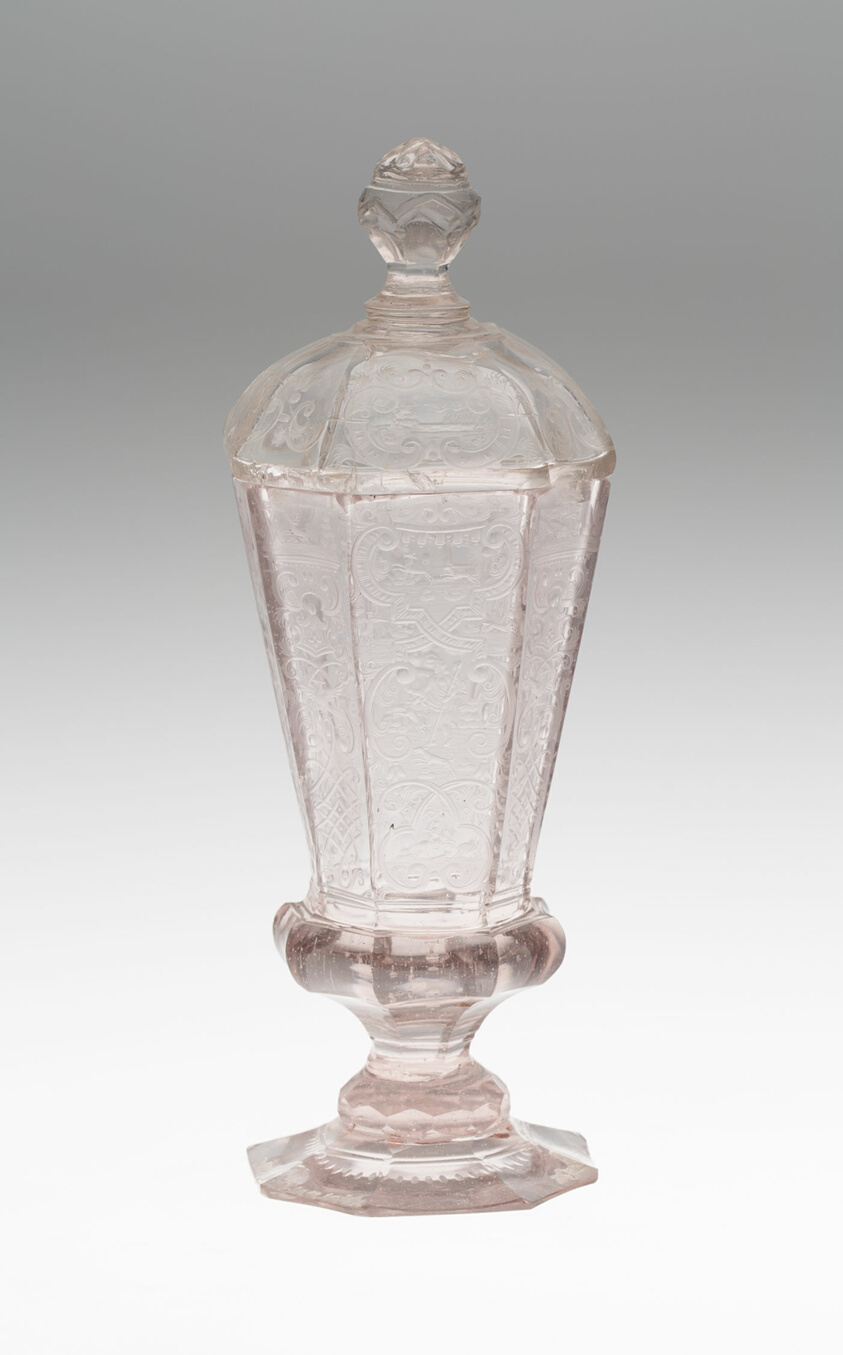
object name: Glass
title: Goblet with Cover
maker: Germany, Schleswig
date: c. 1725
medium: Glass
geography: Schleswig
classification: drinking vessel; glass; european decorative arts